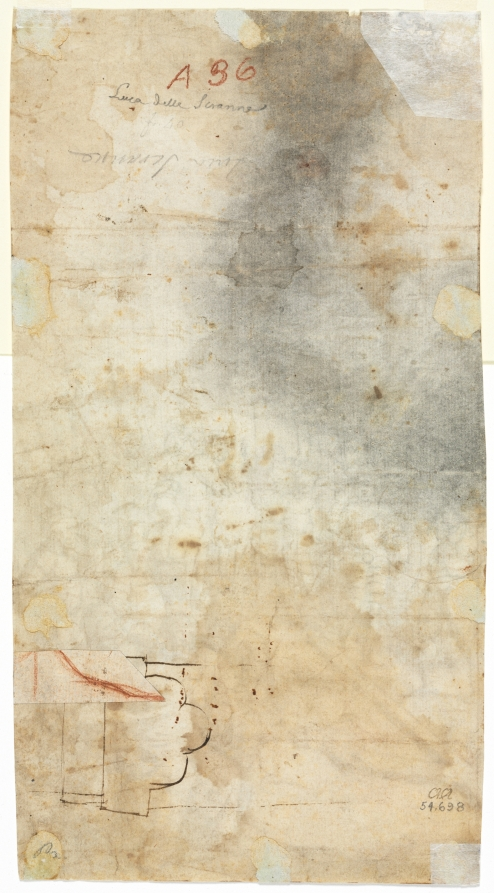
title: Architectural Sketch (verso)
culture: Italy, 16th century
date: 1500s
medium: pen and brown ink with red chalk (on separately applied piece of paper); pricked and pounced in left half (for an unrelated image)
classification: Drawing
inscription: center left, in brown-red crayon: A 36 [sideways] ; center left, in graphite Luca delle Scranne [sideways] ; center left, in graphite: forse [sideways] ; center left, in graphite: Luca Scranne [sideways] ; lower right, in graphite: [8°°?] [sideways]